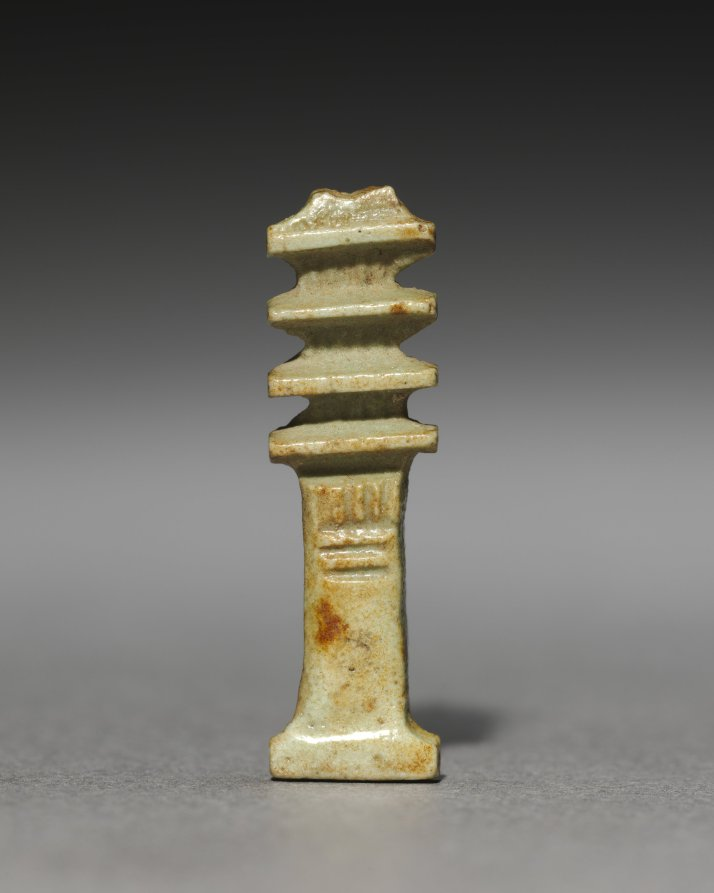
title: Pair of Djed-Pillar Amulets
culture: Egypt, Late period (715–332 BCE), Dynasty 30–Greco-Roman period (332 BCE–395 CE), Ptolemaic dynasty (305–30 BCE)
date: 380–30 BCE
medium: gray-green faience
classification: Amulets